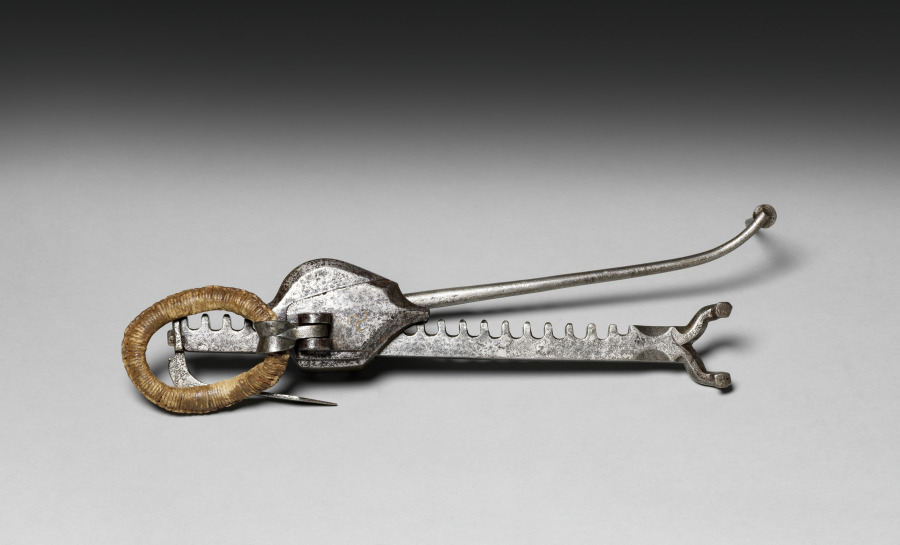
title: Cranequin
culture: France(?)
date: c. 1480–1500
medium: steel and brass; incised decoration; pierced traceried Gothic windows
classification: Arms and Armor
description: Bows made of composite materials were developed during the 1400s. They were immensely powerful and could be spanned only with the aid of a winder called a cranequin like the one seen here.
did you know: The mark, made of inlaid copper, is currently unidentified.